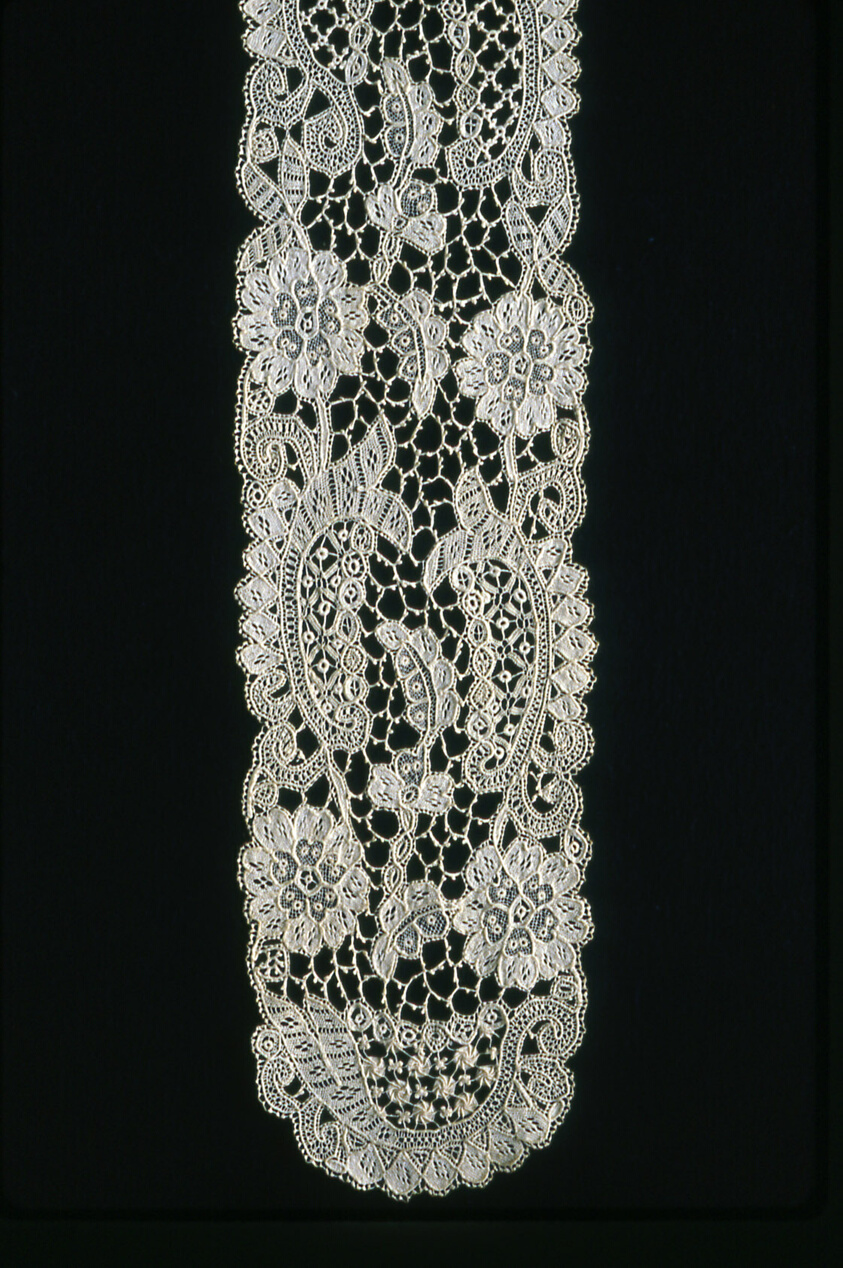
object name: Costume and Accessories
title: Pair of Lappets (Joined)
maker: Ireland, Yarghal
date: 1870s/90s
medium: Cotton, needle lace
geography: Ireland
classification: costume accessory; lace - needle; textile; costume; costume accessory - headdress; costume accessory worn above the waist